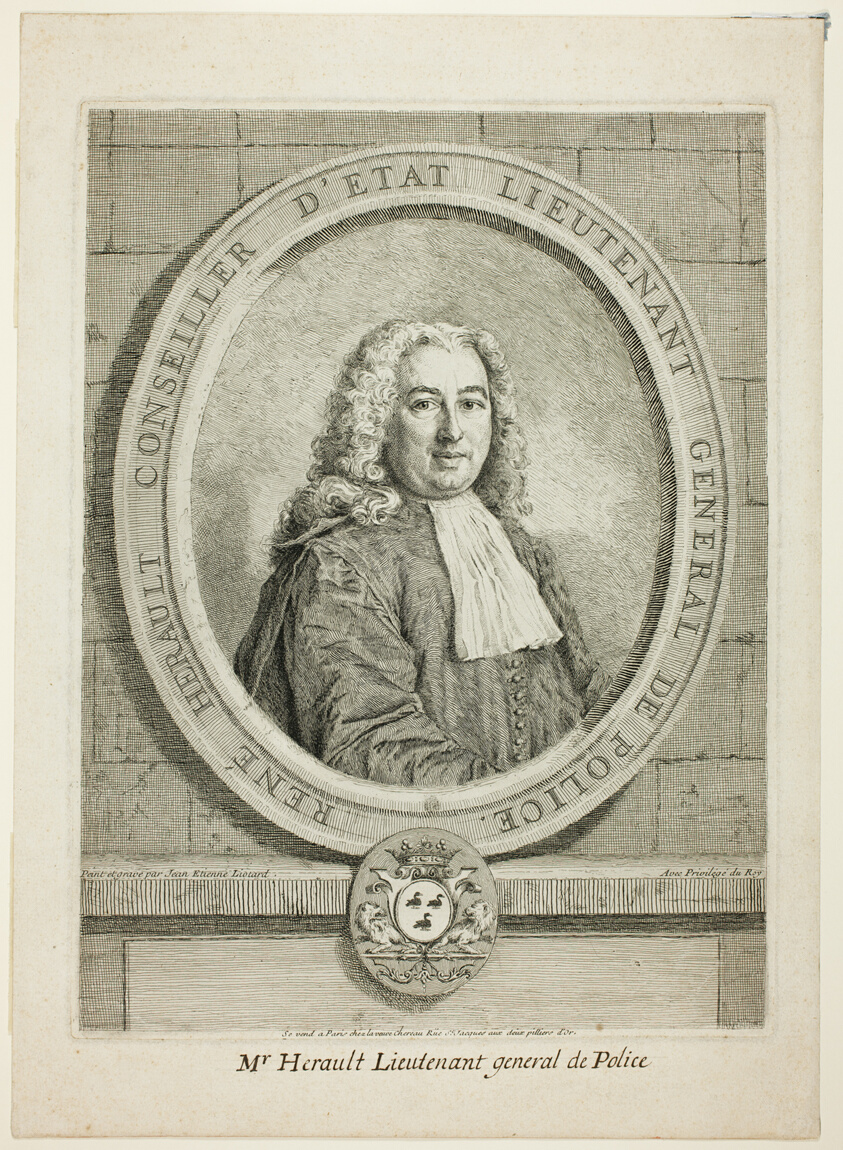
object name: Print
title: René Hérault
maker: Jean-Étienne Liotard; French, 1702-1789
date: 1731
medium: Etching with engraving on laid paper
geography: France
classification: prints and drawing; print; etching; engraving